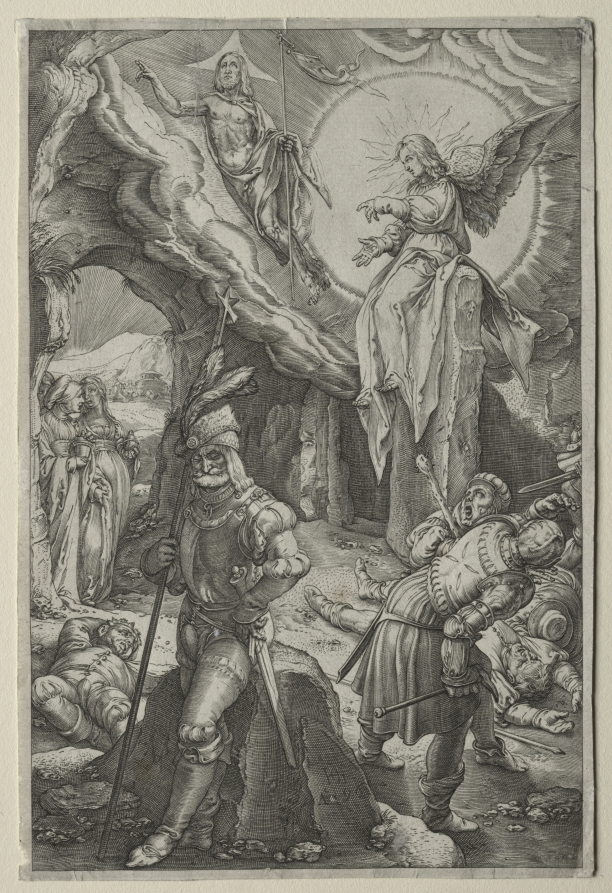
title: The Passion: The Resurrection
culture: Netherlands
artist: Hendrick Goltzius (Dutch, 1558–1617)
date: 1596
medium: engraving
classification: Print